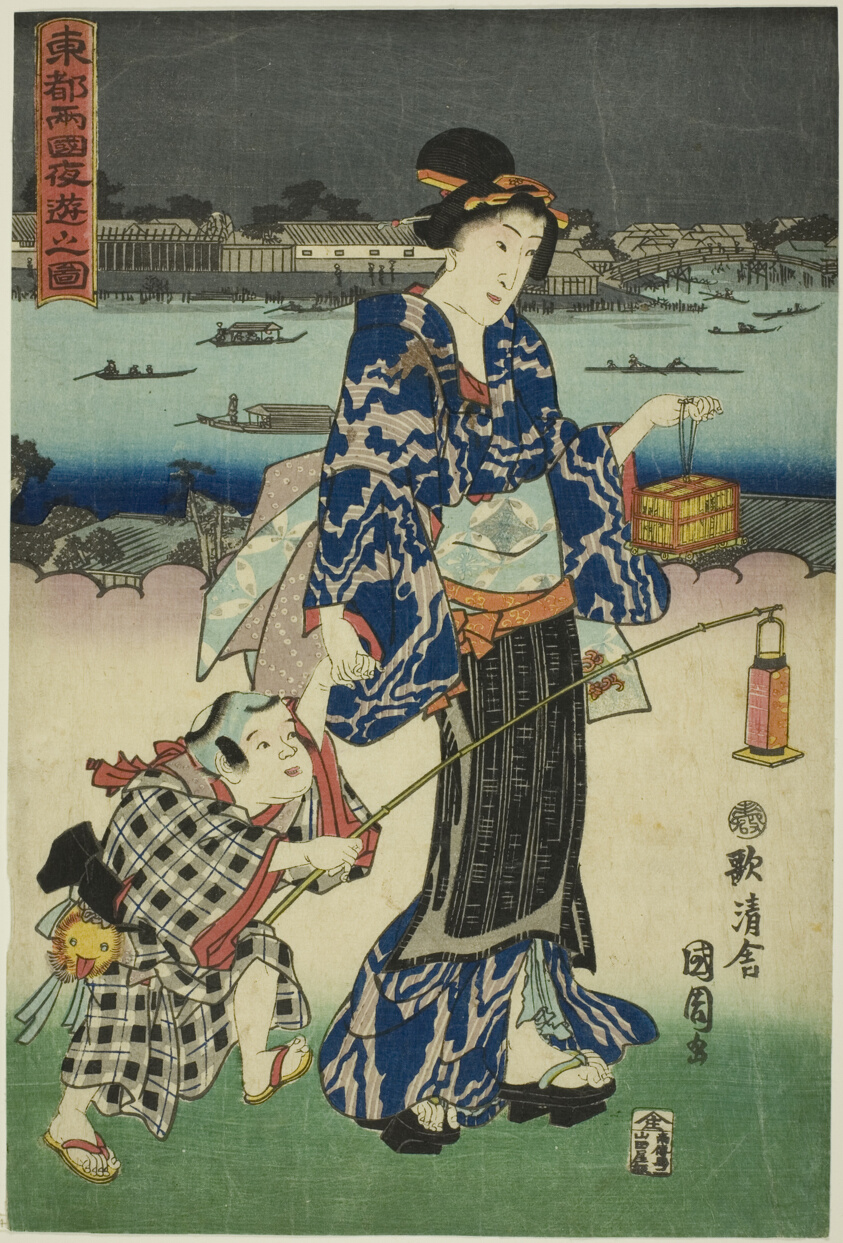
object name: Print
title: Evening Amusements at Ryogoku in the Eastern Capital (Toto Ryogoku yoasobi no zu)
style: Japanese (culture or style)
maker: Toyohara Kunichika (Japanese, 1835-1900)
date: 1859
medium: Color woodblock print; left sheet of oban triptych (right: 1939.1763)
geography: Japan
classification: print; asian art